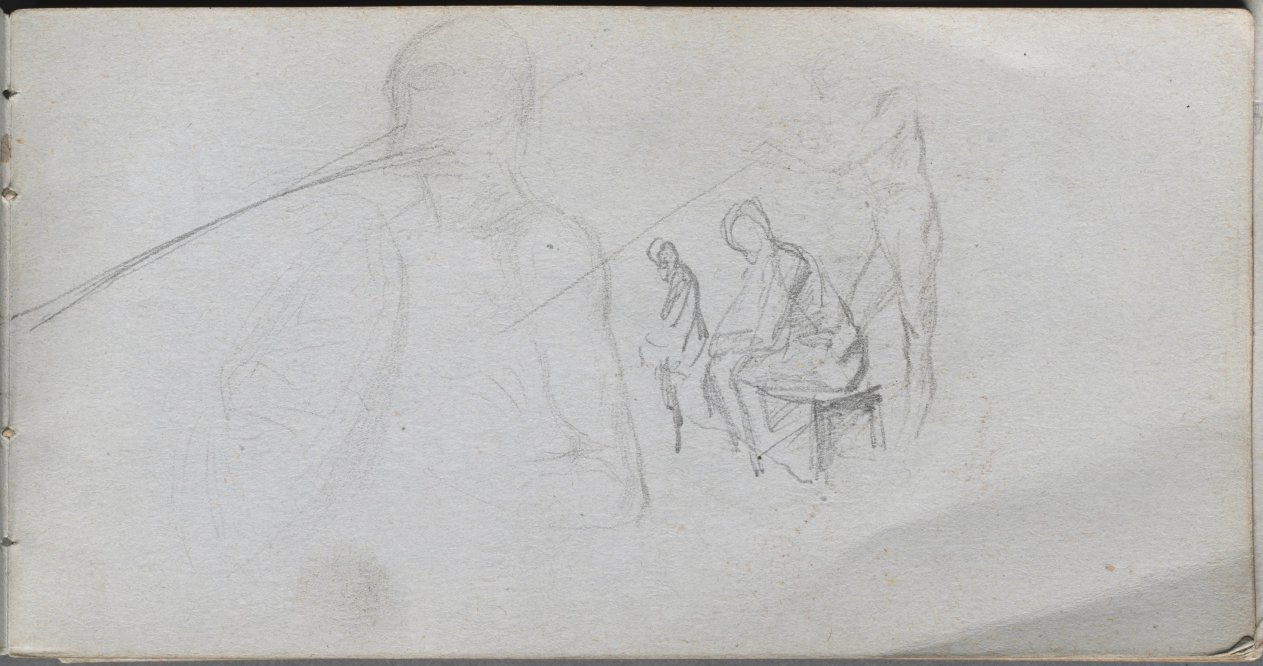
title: Sketchbook, page 98: Study of Figures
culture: France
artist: Ernest Meissonier (French, 1815–1891)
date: c. 1860s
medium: graphite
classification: Bound Volume